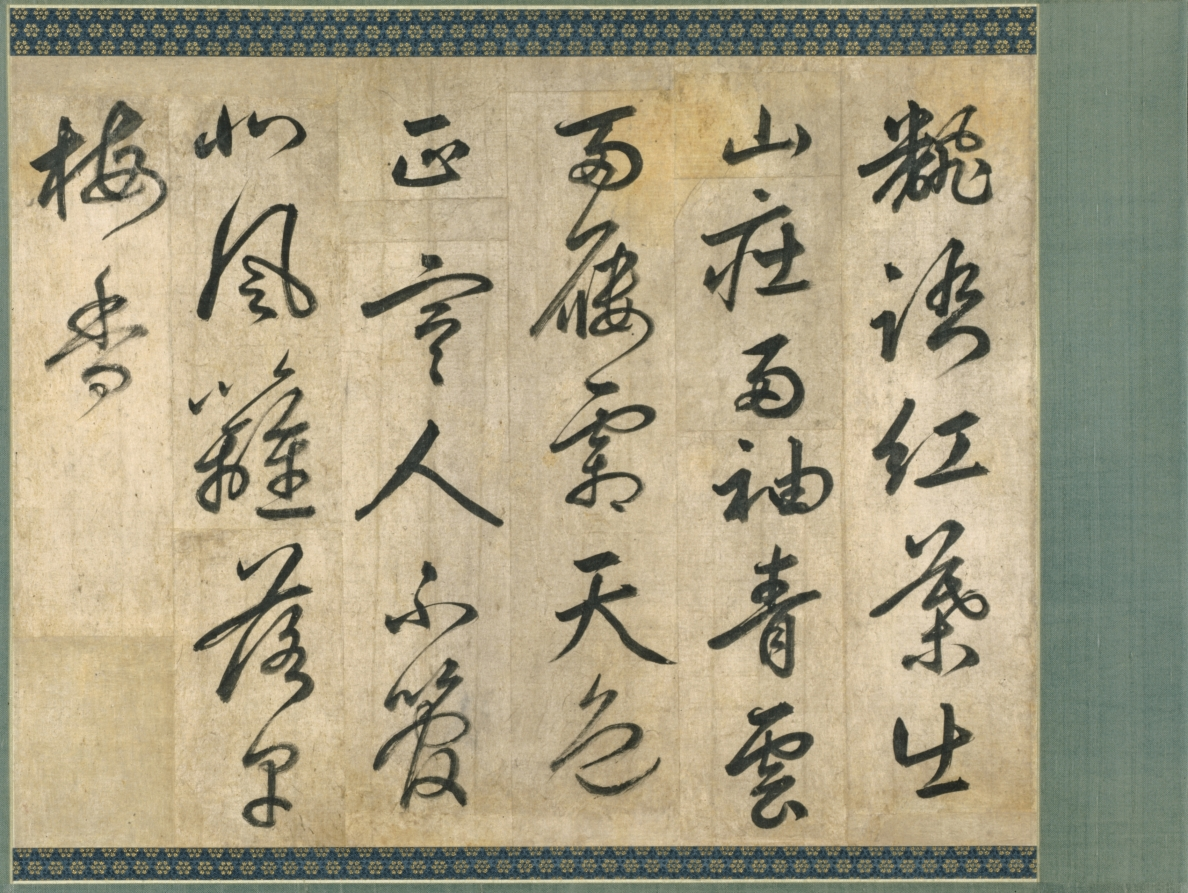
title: Poem on Plum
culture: Korea, Joseon dynasty (1392–1910)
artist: copy after Yi Hwang (Korean, 1501–1570)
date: 1700s–1800s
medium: hanging scroll; ink on paper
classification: Calligraphy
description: For Yi Hwang, a celebrated scholar and poet in 16th-century Korea, writing poems was an escape from partisan politics. Because its flowers often bloom in the middle of winter, Joseon period Korean scholars like Yi found plum blossoms a perfect subject to express the value of endurance and self-cultivation. In his numerous poems, Yi used plum blossom imagery to express his feelings. The poem on this hanging scroll reads: “Wishing to fly away, red leaves left the mountain villa. Their large sleeves are frosted due to blue clouds. The clouds in the sky look upright, which are beyond human beings’ ability. The plum tree whispered to me that [the leaves] fell from the wind and landed on the fence.” The mountain villa in this poem may refer to the Dosan Academy, a Confucian school that Yi established after his retirement, and the red leaves of the plum blossom are probably Yi’s poetic personification.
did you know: Yi Hwang, the author of this calligraphy, composed more than 100 poems on plum blossoms.